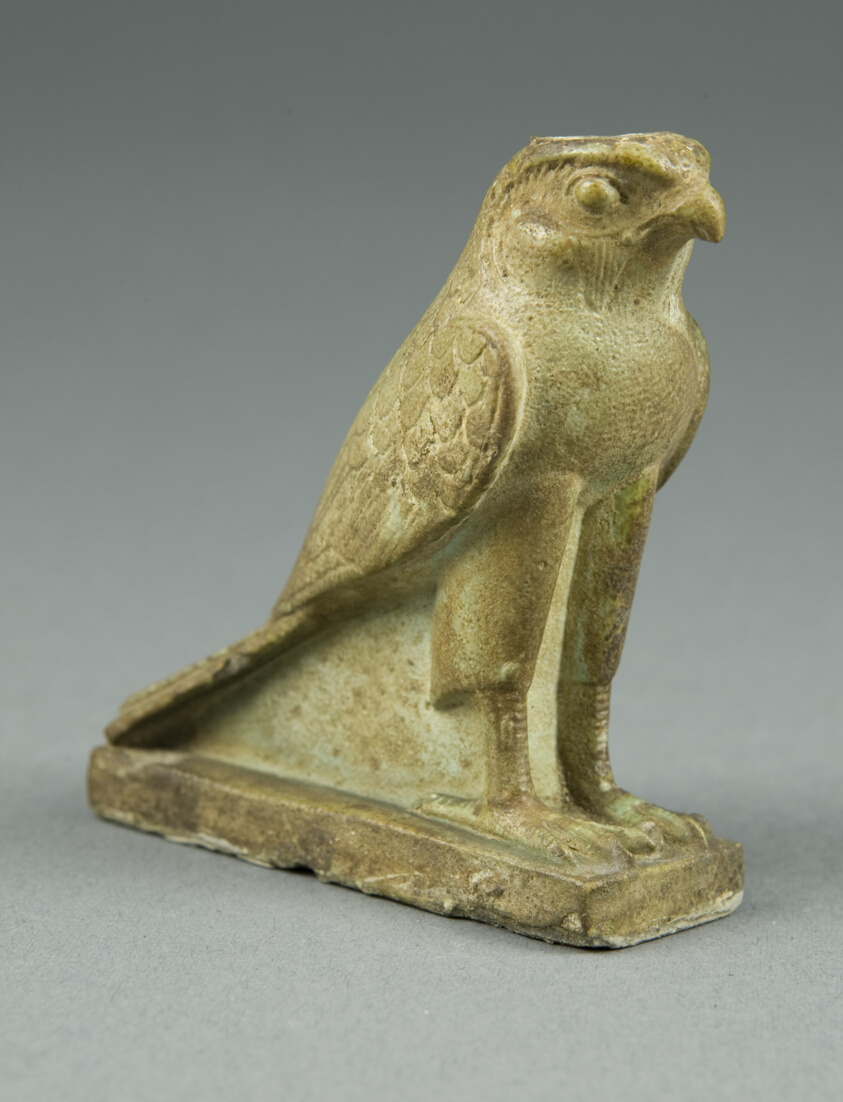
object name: Costume and Accessories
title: Amulet of the God Horus as a Falcon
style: twenty-sixth dynasty, late period (egyptian)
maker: Egyptian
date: Late Period–Ptolemaic Period (664–30 BCE)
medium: Faience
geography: Egypt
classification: amulet; jewelry; ceramics; ancient art; costume; faïence (composite material)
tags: gods (deities)